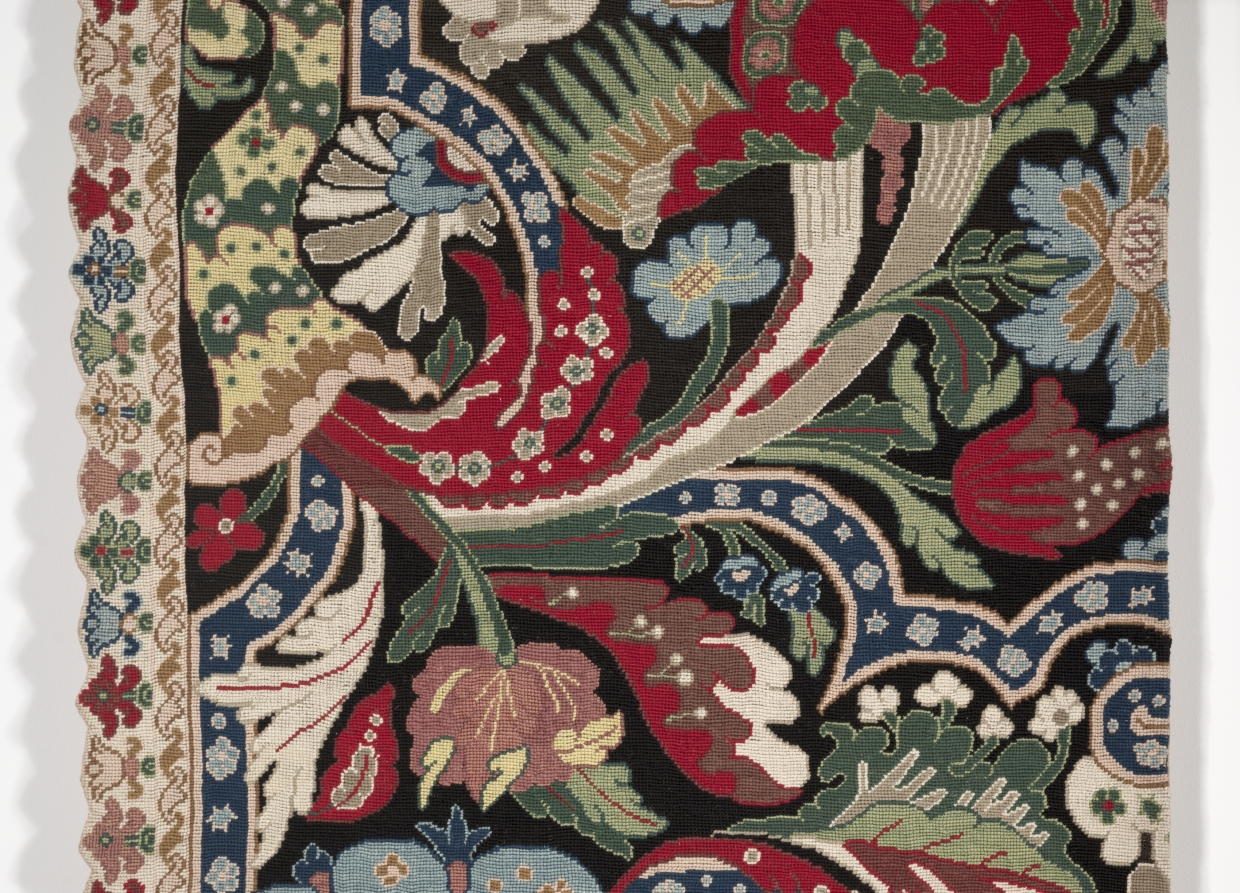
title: Needlework Bed Hanging in the Bizarre style (left half)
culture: France, 18th century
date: 1710–20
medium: Silk, wool; needlework, tent, and cross-stitch embroidery on canvas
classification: Embroidery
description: This panel is one of a pair that would have hung originally around a bed post as part of a full set of hangings on a bedstead in the early 1700s. Elaborate textile hangings were a conspicuous display of wealth since many ladies received their friends within their bedchamber. A full set enveloped the entire bedstead and, when closed, helped retain warmth long after the fire had gone out. This particular pair of panels is remarkable in that they represent many hours of highly skilled needlework. Their design is known as a "bizarre" pattern, which mimicked woven silks of the same era that were asymmetrical, boldly stylized adaptations of Asian fabrics that were coming into the European market from the trading routes at the time.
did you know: The design of this needlework panel is known as a "bizarre" pattern.